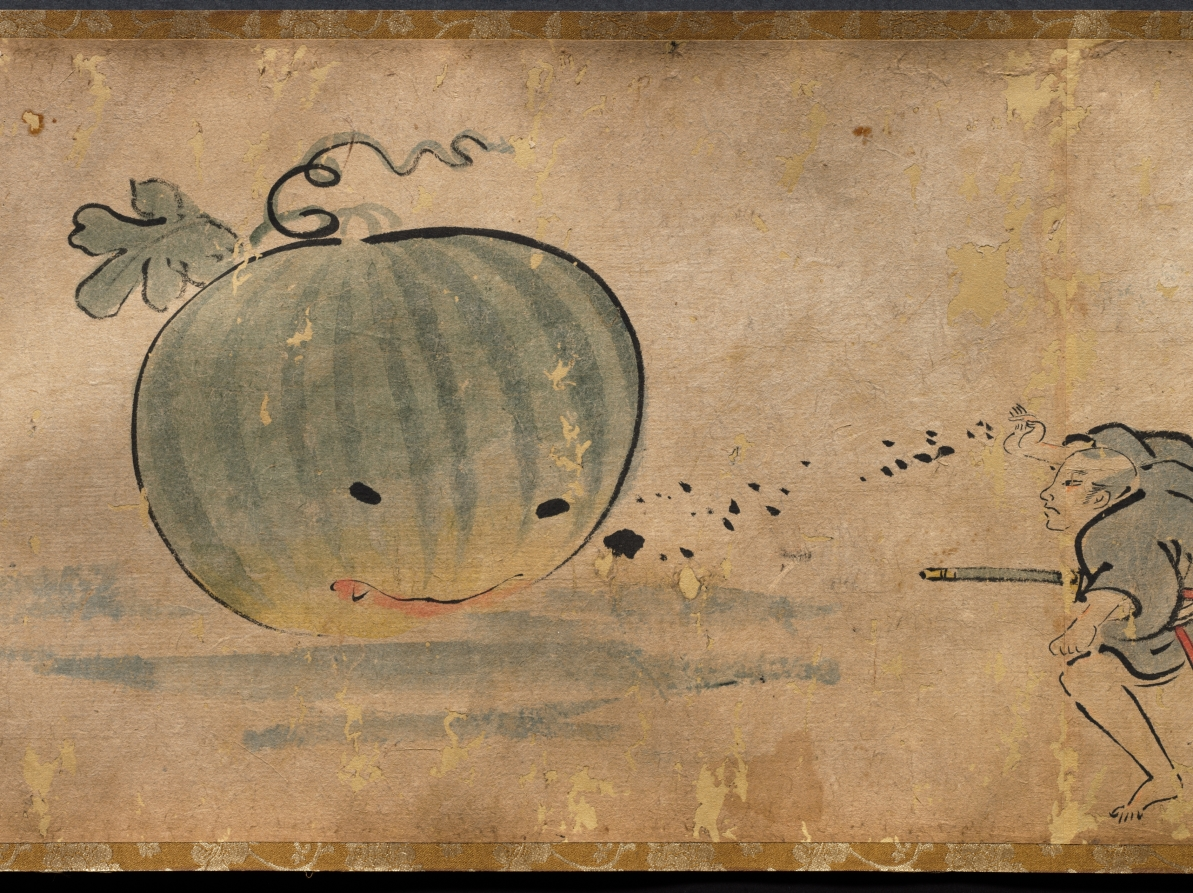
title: The Illustrated Tale of Oishi Hyōroku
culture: Japan, Edo period (1615–1868)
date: 1700s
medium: handscroll; ink and color on paper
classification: Painting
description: This incomplete handscroll illustrates part of the story of Oishi Hyoroku, a young man tasked with battling fox apparitions who were creating problems in his town. In other extant versions of the scroll, the story is set in the fall of 1624 in Kagoshima in southern Japan. Throughout the story, Hyoroku is tricked and terrified by the foxes that shift their shapes into a variety of monstrous phantoms. After repeated humiliations, he eventually captures two of the foxes. In this version, colloquial texts that function like text blurbs in comics appear throughout the scroll, but the main text is missing.